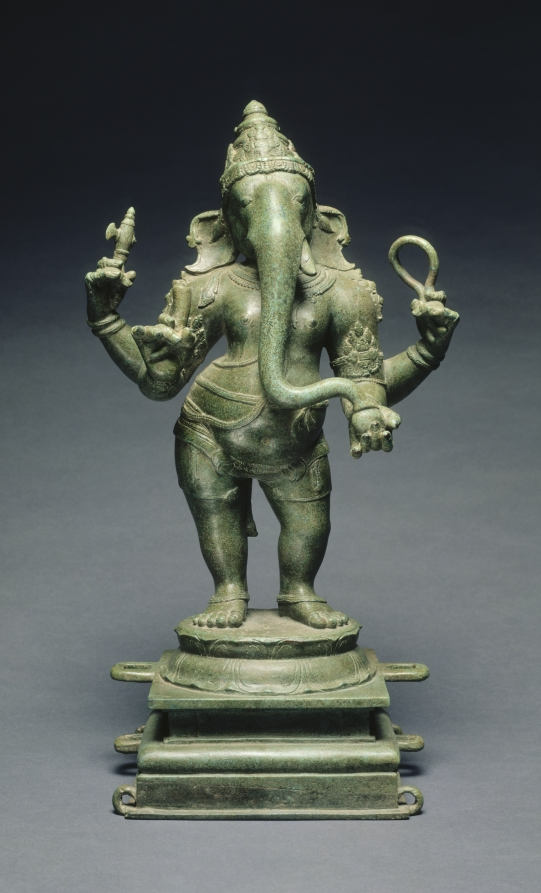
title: Ganesha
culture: South India, Medieval period, Chola dynasty(10th-13th century)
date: c. 1070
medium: bronze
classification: Sculpture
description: Ganesha, the god of wealth and abundance, is an auspicious and revered Hindu deity. He removes obstacles and protects his worshipers. Numerous myths explain how Ganesha became an elephant-man composite, but the most popular version relates the story of how he was decapitated by his enraged father, Shiva, and restored to life through the intervention of his mother, Parvati. Shiva agreed to revive him with the head of the first creature encountered: an elephant. Ganesha's strength—his profound spiritual wisdom—contrasts with his weakness for sweets, as indicated by his pudginess and the sweet modaka he carries. In Ganesha, opposing forces exist in perfect harmony.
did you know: Ganesha pulls his own broken tusk in one hand, which he used as a pen to write the epic Mahabharata.